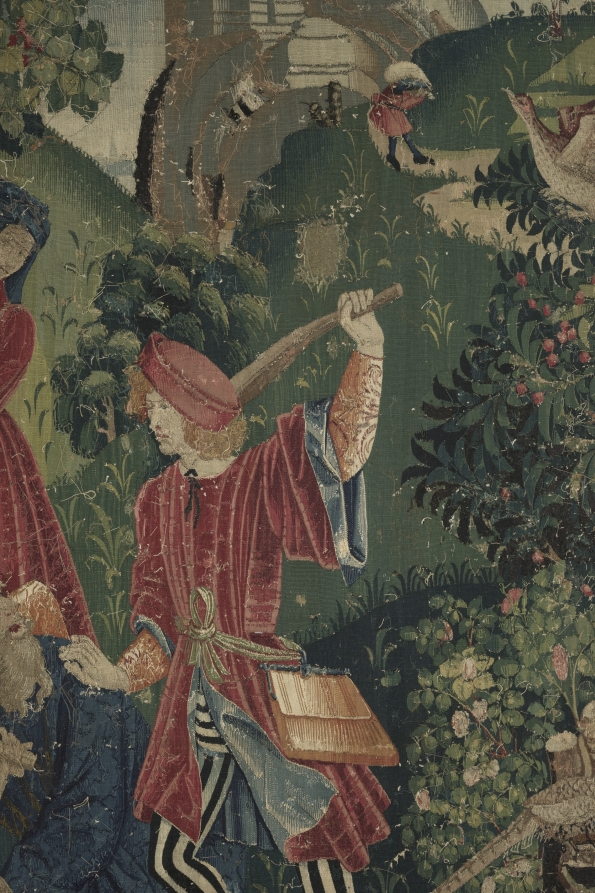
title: Time (from Chateau de Chaumont set)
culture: France, Lyon(?), early 16th century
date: 1512–15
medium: silk and wool; tapestry weave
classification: Tapestry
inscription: French verse in Gothic letters translates as follows: "One sees the weather adorned in green, Sometimes as pleasing as an angel; To suddenly change and be quite strange, The weather never stays the same."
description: Pierre Sala, who likely commissioned the set, is portrayed as the richly attired central figure offering a bouquet, a symbol of knowledge, to Éléonore, his daughter. Éléonore is pregnant, revealed by her upturned skirt and the persimmon in her husband Hector’s hand. Hector’s mother, Marguerite, in dark attire, will wed the widowed Sala in 1519. They appear in front of the royal chateau of Blois. The figures at the right convey Sala’s advice to his children. Time (the old man with the staff) with Clio, the Muse of History, standing on his shoulders, is being attacked by a Herculean youth wielding a stick. With this allegory, Sala is explaining that youth is ignorant of the complexities of life and time. The small unicorn at the far right represents the soul. The verse in Old French at the top refers to changing time: One sees Time adorned with green foliage, Sometimes as pleasant as an angel, Then suddenly change and become quite strange. Never does Time persist in one state.